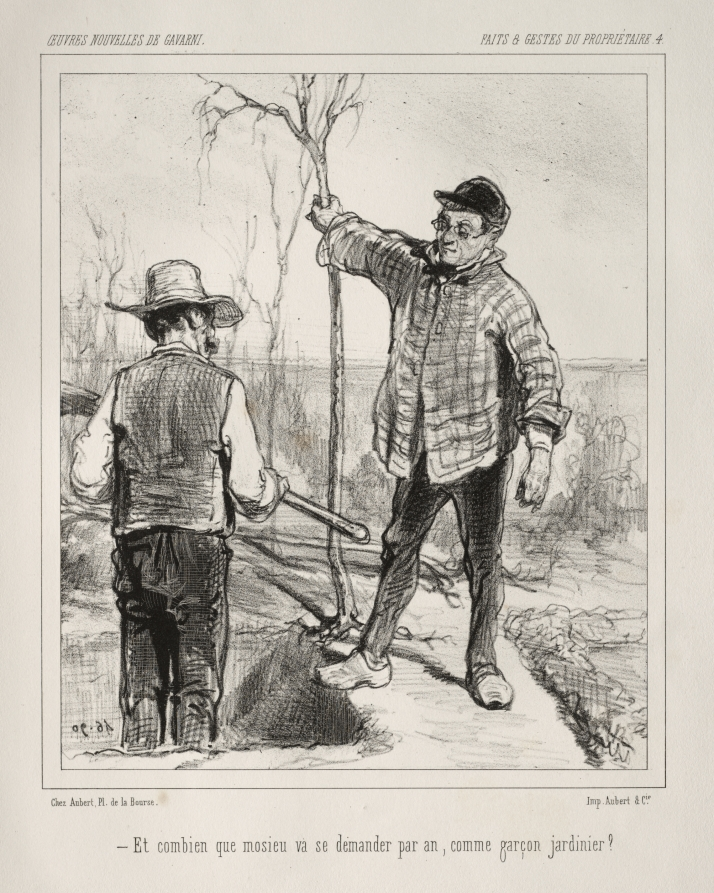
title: Faite et Gestes du Propriétaire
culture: France, 19th century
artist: Paul Gavarni (French, 1804–1866)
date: c. 1847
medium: lithograph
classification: Print